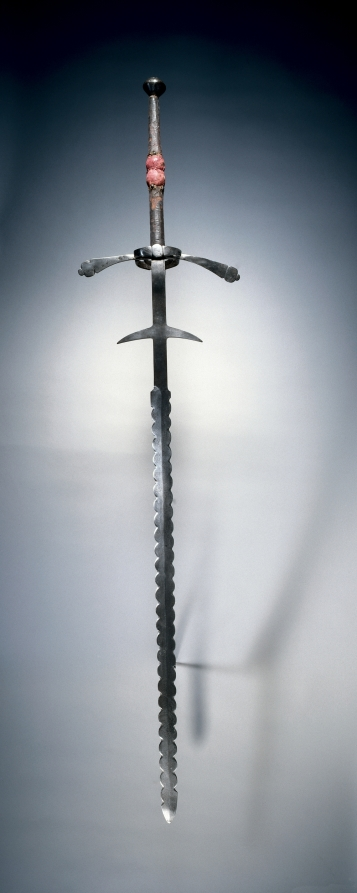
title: Two-Handed Sword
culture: Germany, second half of 16th Century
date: 1550–1600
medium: steel; leather and wood grip, cloth-covered middle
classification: Arms and Armor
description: The two-handed sword, originally a weapon of war for specialist infantry, is so named because two hands were required to wield it. By the late 1600s, these enormous swords assumed a largely ceremonial or bodyguard function.